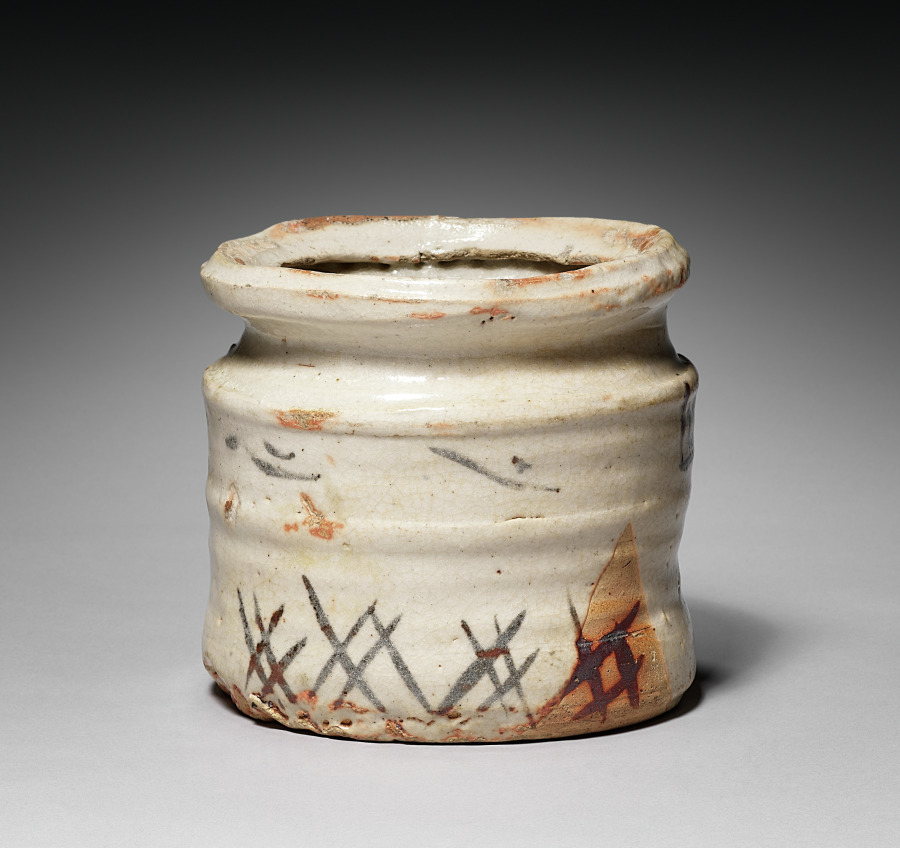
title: Water Container (Mizusashi) with Riverscape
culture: Japan, Momoyama period (1573-1615) to Edo period (1615-1858)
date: late 1500s–early 1600s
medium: Stoneware with underglaze iron oxide slip decoration (Mino ware, Shino type)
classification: Ceramic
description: Mizusashi are jars used to hold water for the preparation of tea at tea gatherings. This one was produced in the Mino area of present-day Gifu prefecture in central Japan, and is considered one of the finest of its type in existence, based on the complex aesthetic sensibilities developed around the tea ceremony in Japan. It is called a “picture Shino” (e-shino) mizusashi, as it has an abstracted design said to resemble an ink painting of reeds along a river bank and small boats in a river on one side, and a geometric pattern on the other. With its irregular shape and thick, luminous glaze, it is of a variety favored by eminent tea masters of the Momoyama period.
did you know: The water this container held during a tea ceremony was used to fill the kama, or iron pot in which the water is heated.